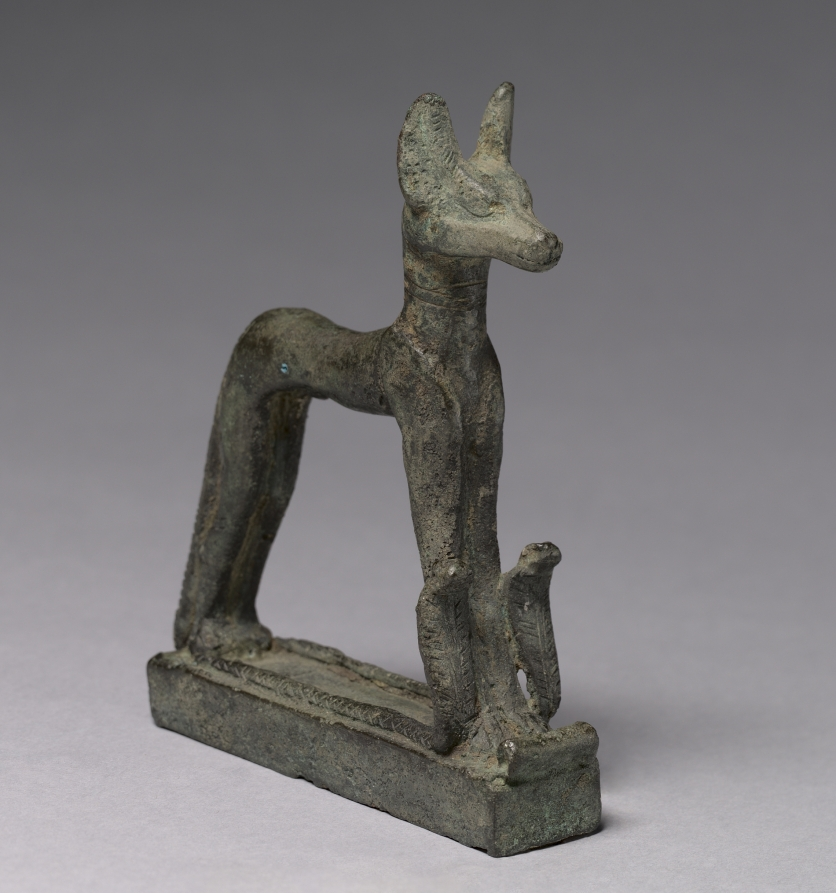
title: Jackal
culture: Egypt, Late period (715–332 BCE), Dynasty 26 or later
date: 664–30 BCE OR 664–330 BCE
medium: bronze, solid cast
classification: Sculpture